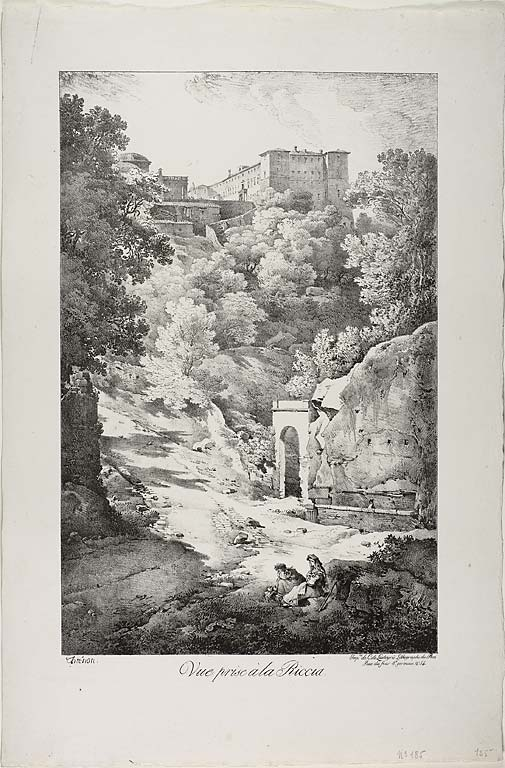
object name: Print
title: View from La Riccia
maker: Claude Thienon (French, 1772-1846); printed by Comte de Charles Philibert Lasteyrie du Saillant (French, 1759-1849)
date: 1817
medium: Lithograph in black on ivory wove paper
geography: France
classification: lithograph; print; prints and drawing